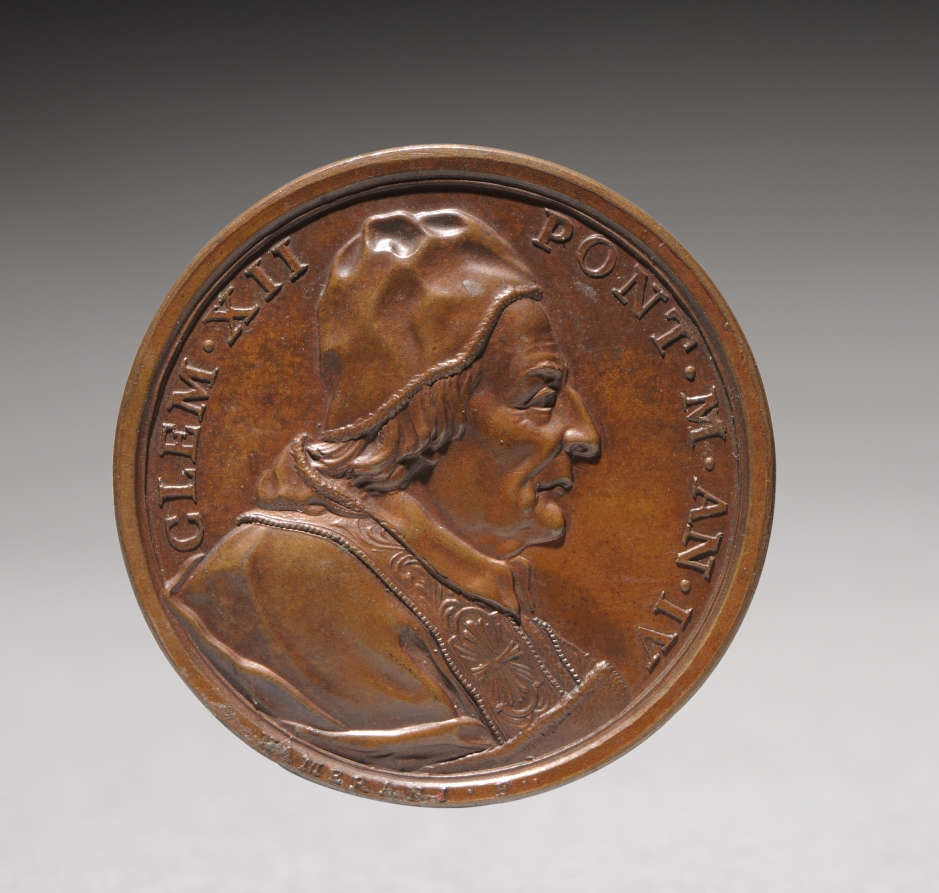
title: Portrait of Pope Clement XII Corsini (obverse)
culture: Italy, Rome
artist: Ottone Hamerani (Italian, 1694–1761)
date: 1734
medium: bronze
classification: Sculpture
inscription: inscribed: CLEM.XII.PONT.M.AN.IV.HAMERANI.F.